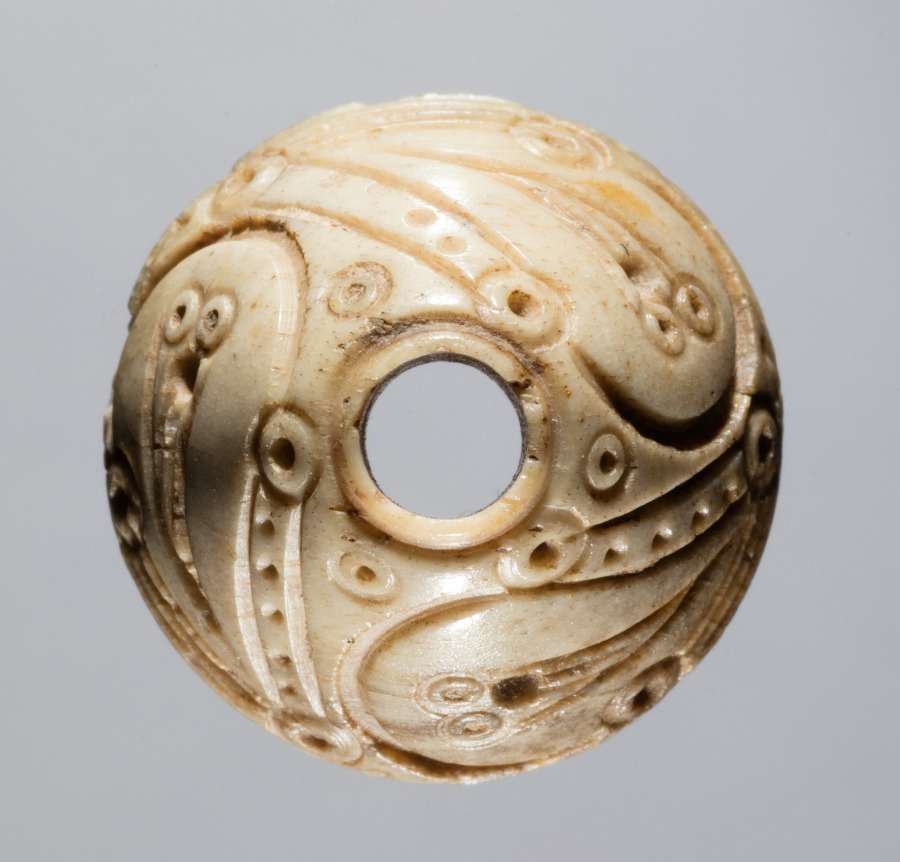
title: Spindle Whorl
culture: Iran, early Islamic period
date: 700s - 900s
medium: bone, incised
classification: Spindle Whorl